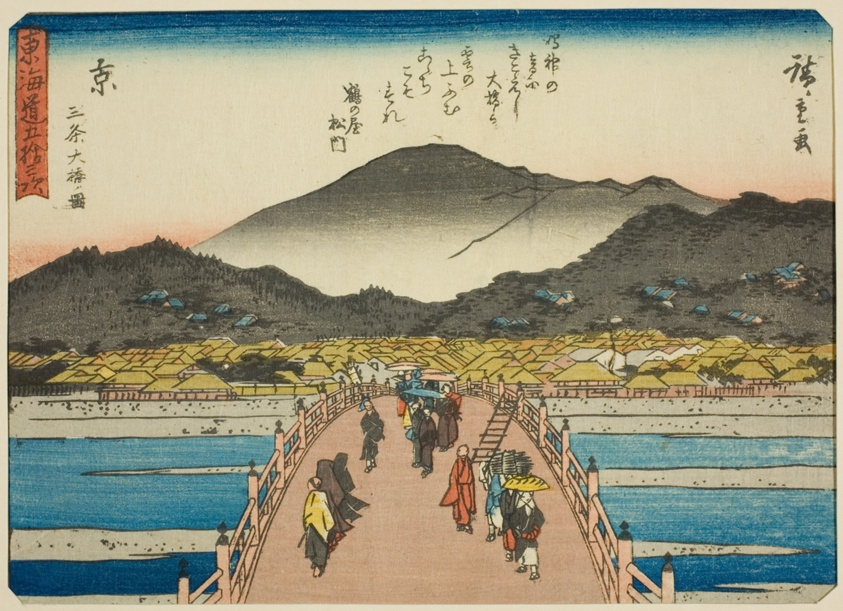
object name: Print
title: Kyoto: The Great Bridge at Sanjo (Kyo, Sanjo Ohashi zu), from the series "Fifty-three Stations of the Tokaido (Tokaido gojusan tsugi)," also known as the Tokaido with Poem (Kyoka iri Tokaido)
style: Japanese (culture or style)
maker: Utagawa Hiroshige 歌川 広重; Japanese, 1797-1858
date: c. 1837/42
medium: Color woodblock print; chuban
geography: Japan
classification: woodblock print; print; asian art